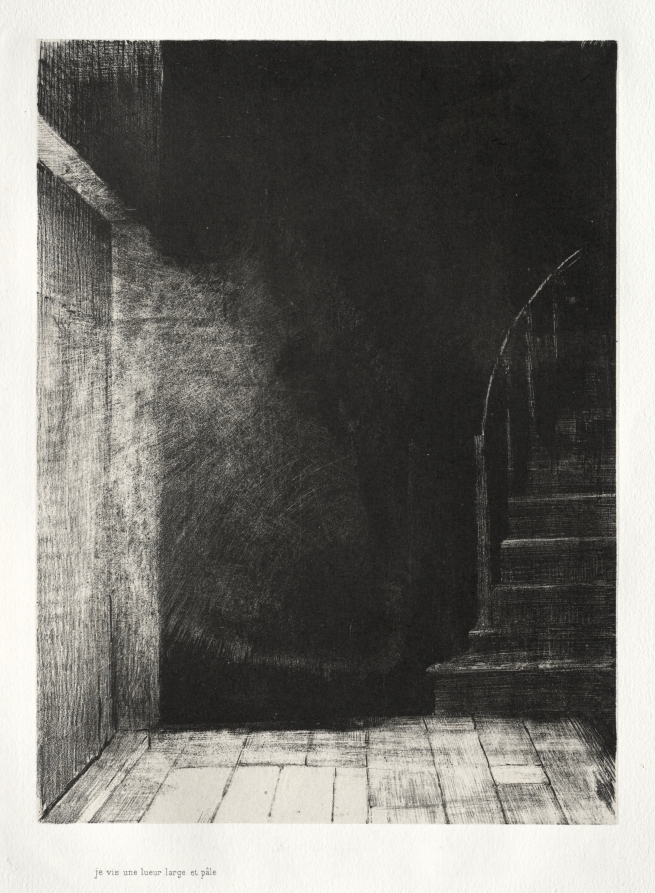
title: I Saw a Flash of Light, Large and Pale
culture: France, late 19th Century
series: The Haunted House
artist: Odilon Redon (French, 1840–1916)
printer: Auguste Clot (French, 1858–1936)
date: 1896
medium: lithograph on China paper laid on wove paper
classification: Print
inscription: printed at lower left, below image: je vis une lueur large et pâle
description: Odilon Redon was a voracious reader of contemporary literature, and such texts often influenced his art. This series was inspired by The Haunted and the Haunters, an 1859 novel by British writer Edward Bulwer-Lytton. Redon’s prints capture the book’s mysterious tone and emphasis on the supernatural through vague but evocative imagery that sometimes borders on abstraction. By this time a seasoned expert in lithography, the artist collaborated with master printer Auguste Clot. Their combined technical skills allowed for the rich tonal variation seen here, made by turning Redon’s lithographic crayon on its side, layering various marks, and even scratching directly into the surface of his stone.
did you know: One of Redon's greatest patrons, the occultist René Philipon, commissioned this portfolio as a supplement for his French translation of Bulwer-Lytton's The Haunted and the Haunters.